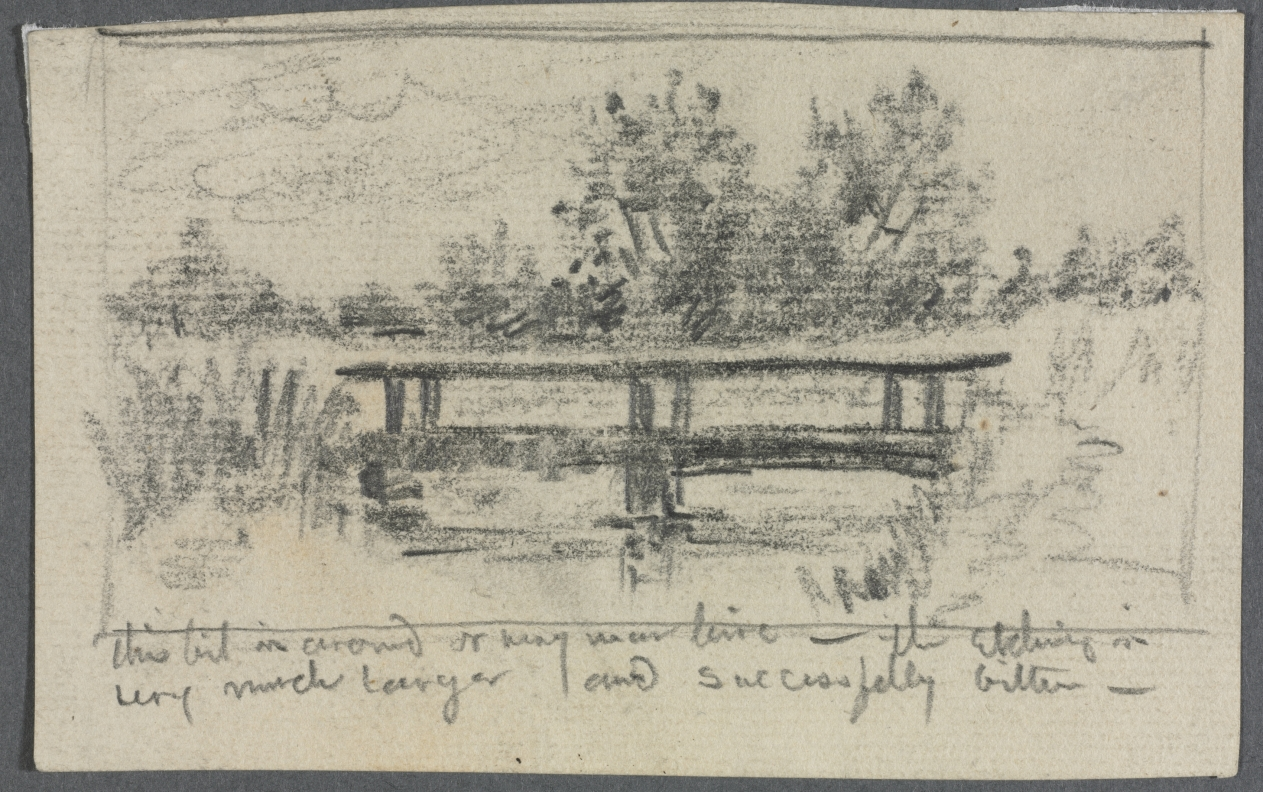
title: The Bridge, Schleissheim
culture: America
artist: Otto H. Bacher (American, 1856–1909)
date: c. 1870–1909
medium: pencil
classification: Drawing